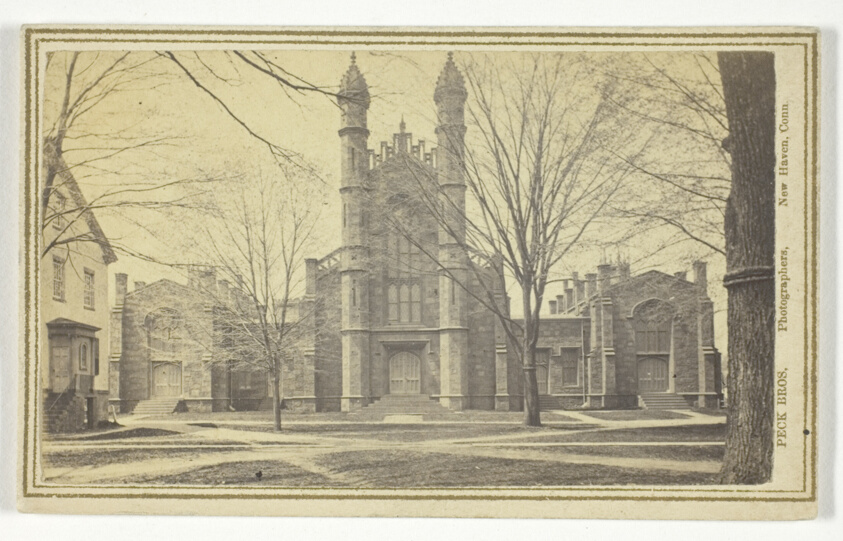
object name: Photograph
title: Library, Yale University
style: 19th century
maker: Peck Brothers (American, 19th century)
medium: Albumen print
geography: United States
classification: carte-de-visite (albumen); albumen silver print; photographic process; photography; card photographs; photograph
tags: Collected by Hugh Edwards